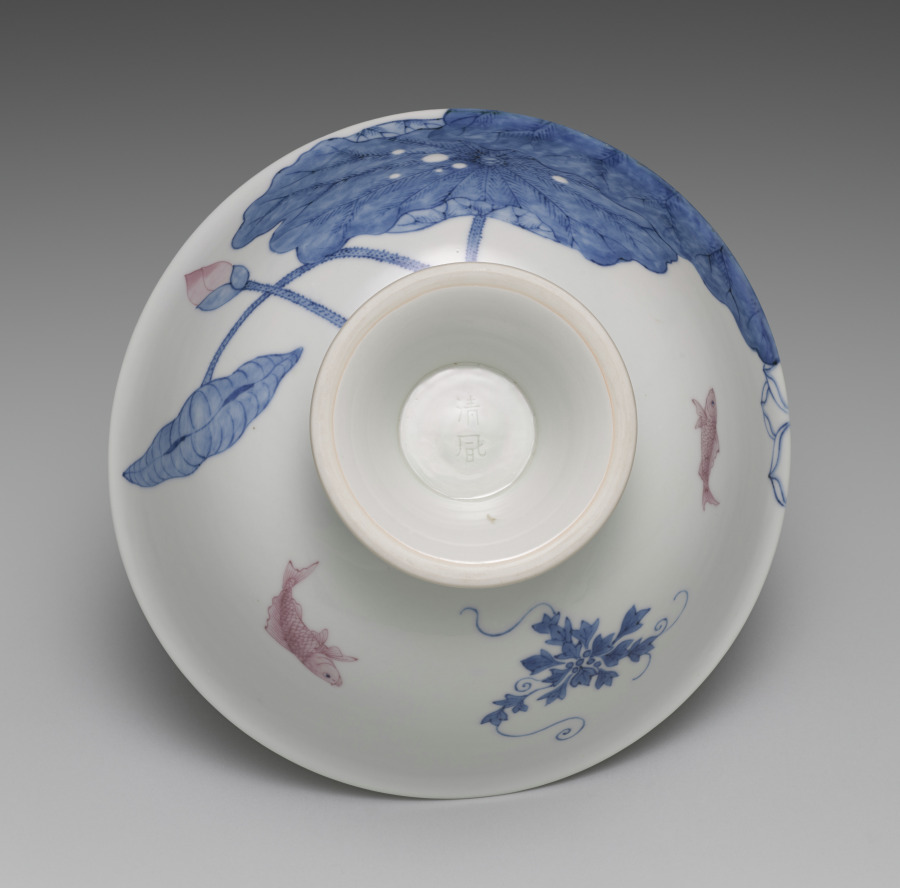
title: High-Footed Bowl with Lotus Pond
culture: Japan, Meiji period (1868–1912)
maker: Seifū Yohei III (Japanese, 1851–1914)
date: 1887–92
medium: Porcelain with underglaze color and modeled designs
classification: Ceramic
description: Seifū Yohei III was the most prominent head of a ceramics studio in Kyoto that specialized in Chinese-style porcelains and especially items for use in sencha (煎茶), or the drinking of steeped-leaf tea with companions. Sencha was popular among the bunjin of Kyoto and Osaka, who often enjoyed it as part of their emulation of Chinese culture. While sencha was by design less formal than the Japanese tea ceremony, it still featured the display of treasured objects. Prized Chinese antiquities were generally unobtainable, so substitutes such as the Gu-Shaped Flower Vase, CMA 2022.224, were much in demand. Bowls for distributing sweets, like this one, were also a staple of sencha gatherings.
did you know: This high-footed bowl simulates exploration of a pond both from underwater and from the sky.